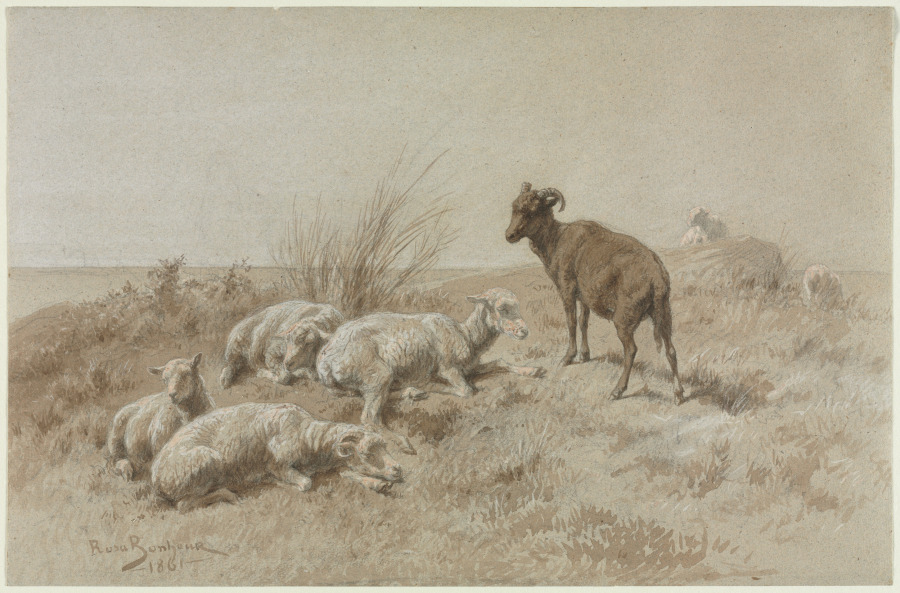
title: Sheep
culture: France, 19th century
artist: Rosa Bonheur (French, 1822–1899)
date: 1861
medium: brush and brown wash over graphite, heightened with lead white (partially oxidized to pink)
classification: Drawing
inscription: signed, lower left, in brown wash: Rosa Bonheur / -1861- ; VERSO, 1629 [illegible] [partially masked]